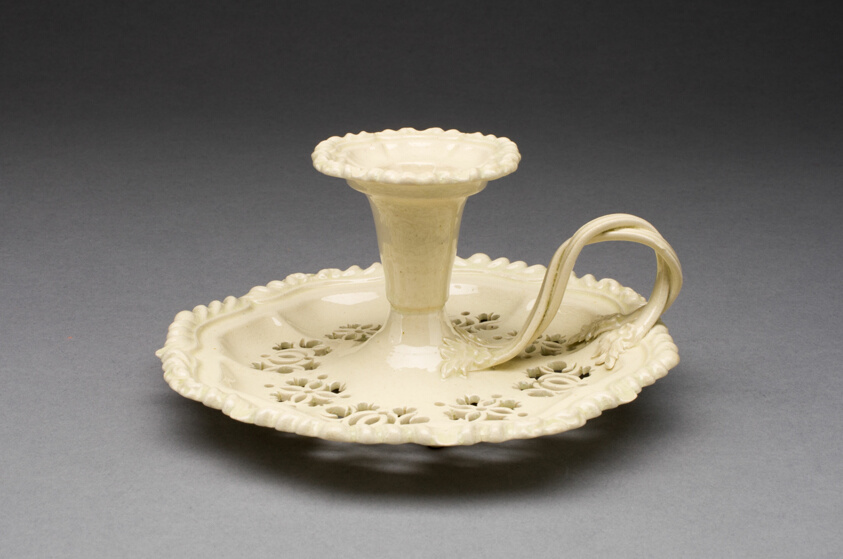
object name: Ceramics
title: Candlestick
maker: Leeds Pottery; English, founded 1756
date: 1780/1800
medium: Lead-glazed earthenware (creamware)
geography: Yorkshire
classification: candleholder - candlestick; candleholder; earthenware; european decorative arts; ceramics; creamware; lead-glazed earthenware